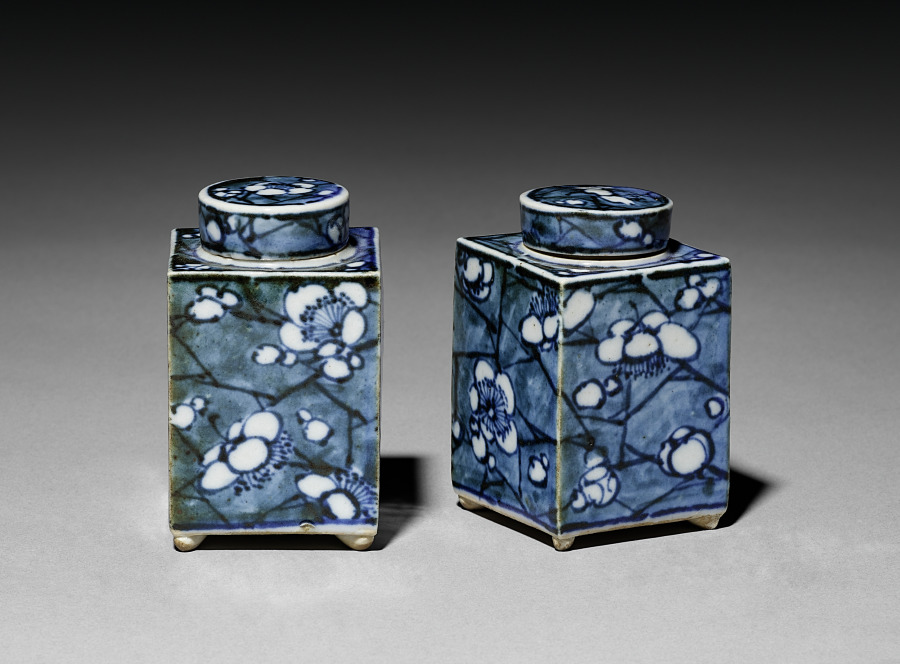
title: Pair of Tea Containers with Plum Blossoms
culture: Japan, Edo period (1615–1868)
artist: Aoki Mokubei (Japanese, 1767–1833)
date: early 1800s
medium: porcelain with underglaze blue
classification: Ceramic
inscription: signed "Ro Mokubei" on base in underglaze blue.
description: Aoki Mokubei, born into a family of restaurateurs, was a potter, calligrapher, painter, and scholar, and is considered one of the three masters of later Edo period Kyoto ceramics. He specialized in porcelains fashioned after Chinese prototypes, and created works for steeped tea (sencha) such as these matching tea caddies decorated in an underglaze blue called sometsuke—literally “with applied dye.” He signed them on their bottoms. They also have intricately patterned silk sleeves to both beautify and protect them. On the exterior of the lid of the outer wooden box that contains them, it is written that Mokubei inscribed and painted an image on the box. On the interior of the lid, the signature and seals of a former owner are written. Mokubei has signed the lid of the inner box, and a charming ink and light color composition of West Lake in Hangzhou in China covers its three sides. On the fourth side is a long inscription by Mokubei describing the scene.